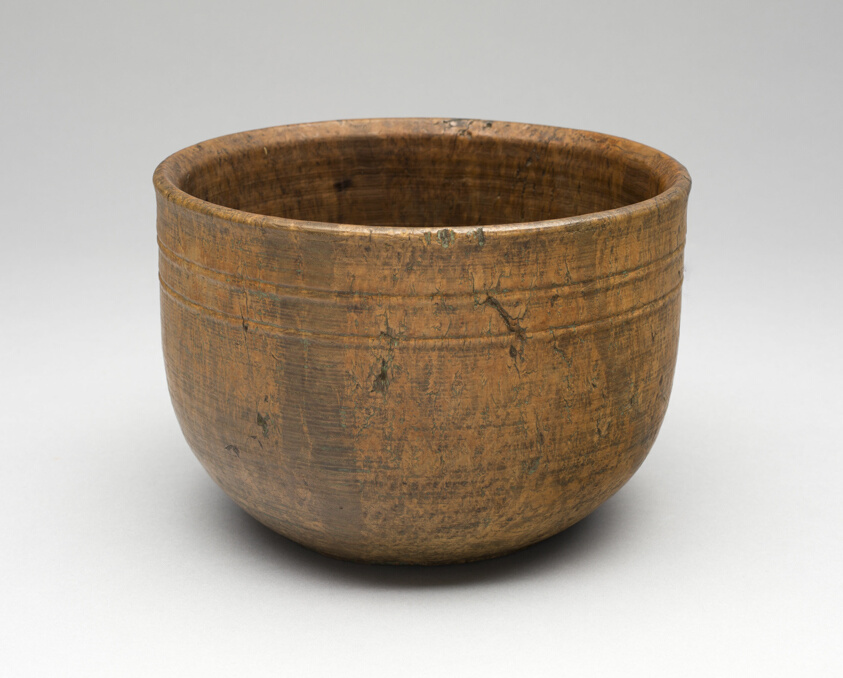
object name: Decorative Arts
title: Bowl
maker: Artist unknown (American, 19th century)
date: 1820–60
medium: Maple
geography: United States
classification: bowl; wood; american decorative arts; american arts; decorative arts